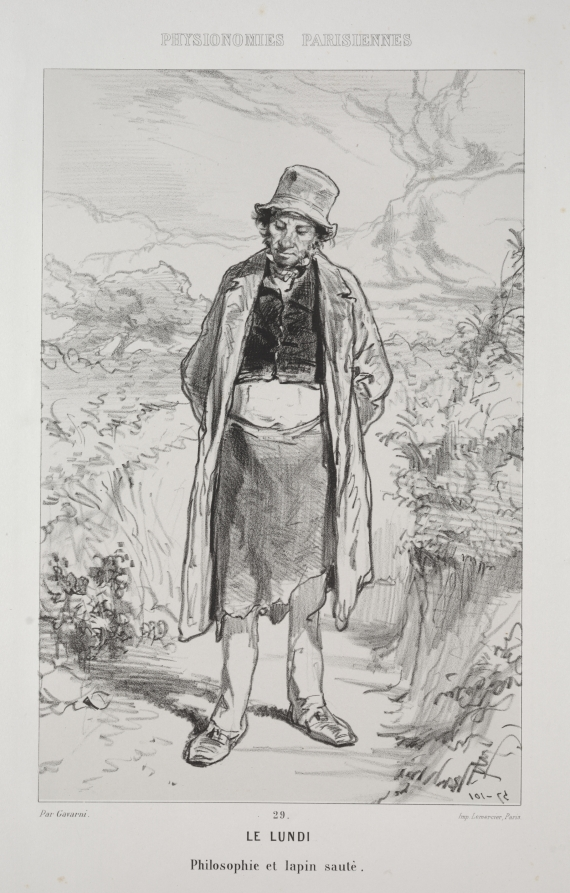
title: Le Lundi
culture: France, 19th century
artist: Paul Gavarni (French, 1804–1866)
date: c. 1857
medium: lithograph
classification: Print